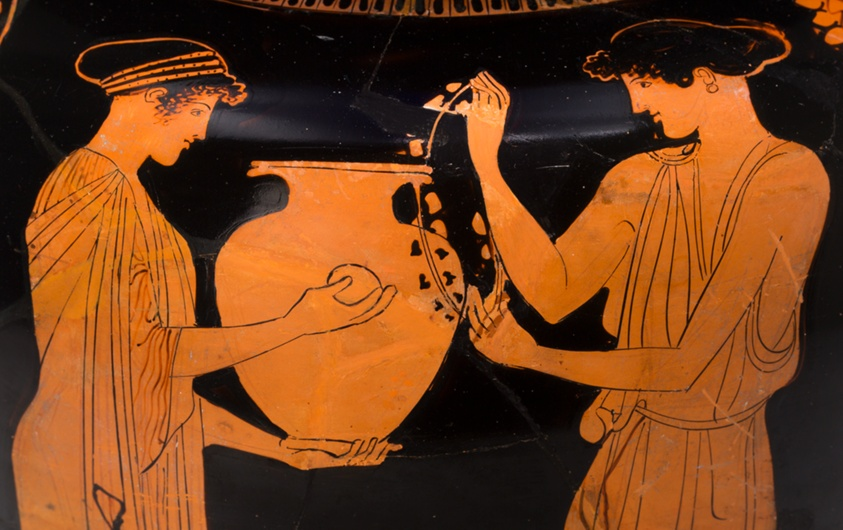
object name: Vessel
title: Stamnos (Mixing Jar)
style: high classical, Classical, attic, red-figure, ancient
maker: Attributed to the Chicago Painter; Greek; Athens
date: about 450 BCE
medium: terracotta, red-figure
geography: Athens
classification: vessel; earthenware; ceramics; ancient art; container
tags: drinking, dining, women, human figures, Greek, females, festivals, female figures, daily life, men, chairs, Greece, cups, interiors